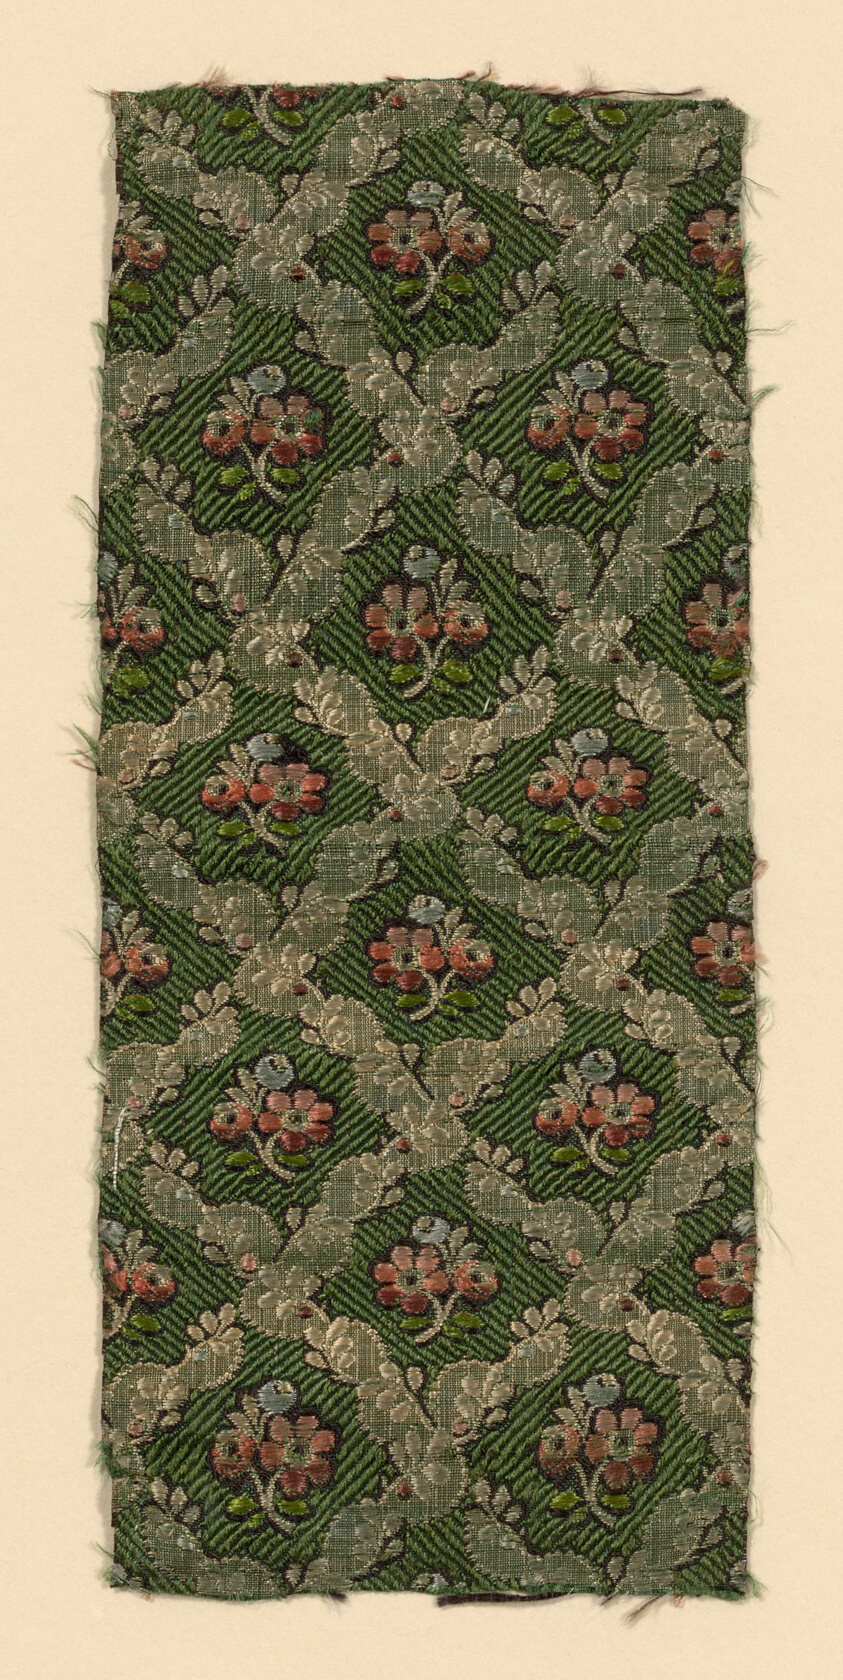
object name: Textile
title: Fragment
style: louis xvi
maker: France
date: 1775/1800, Louis XVI period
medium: silk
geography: France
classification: textile; weaving